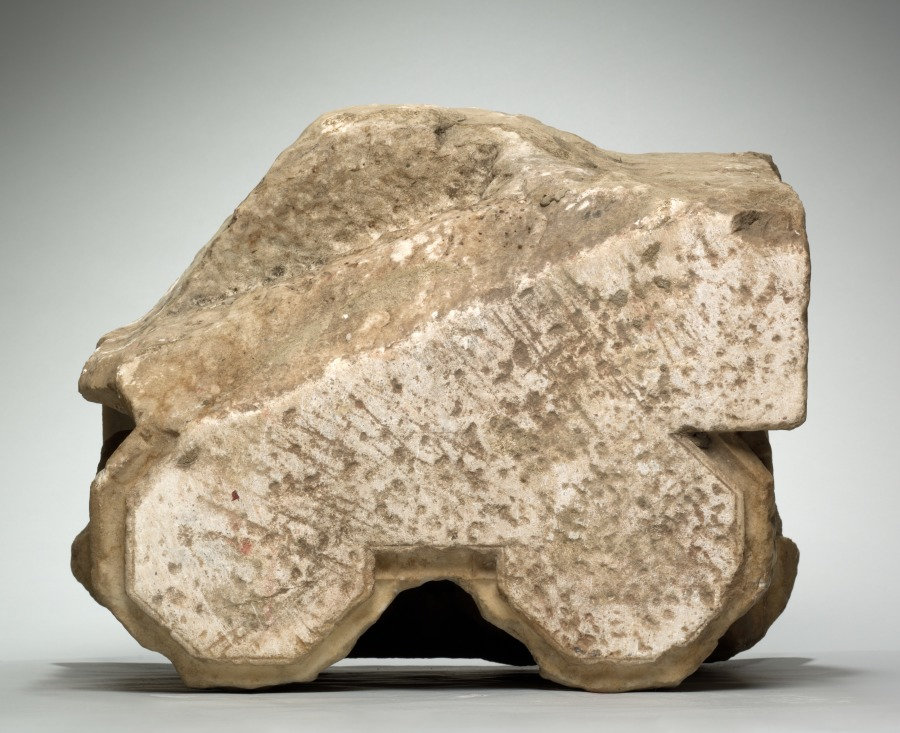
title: Engaged Capital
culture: Southern France, Abbey of Larreule, near Tarbes, 15th century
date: 1400s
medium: limestone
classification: Sculpture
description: This capital belongs to a surviving group including other architectural fragments that once decorated the cloister of the Abbey of Larreule. A cloister was a covered walkway or arcade, usually around all four sides of a square area of grass (the "cloister garth"). The seclusion of the cloister was the monks’ exclusive domain, off limits to others. Here, the monks were supposed to pray, study, meditate, and exercise in privacy and solitude. Such cloister capitals served both to instruct the monks and as a focus for their devotions. Other capitals in this series are installed in the Jardin Massey at Tarbes, near the original abbey. An arch from Larreule has been assembled with other associated French capitals at The Cloisters in New York.